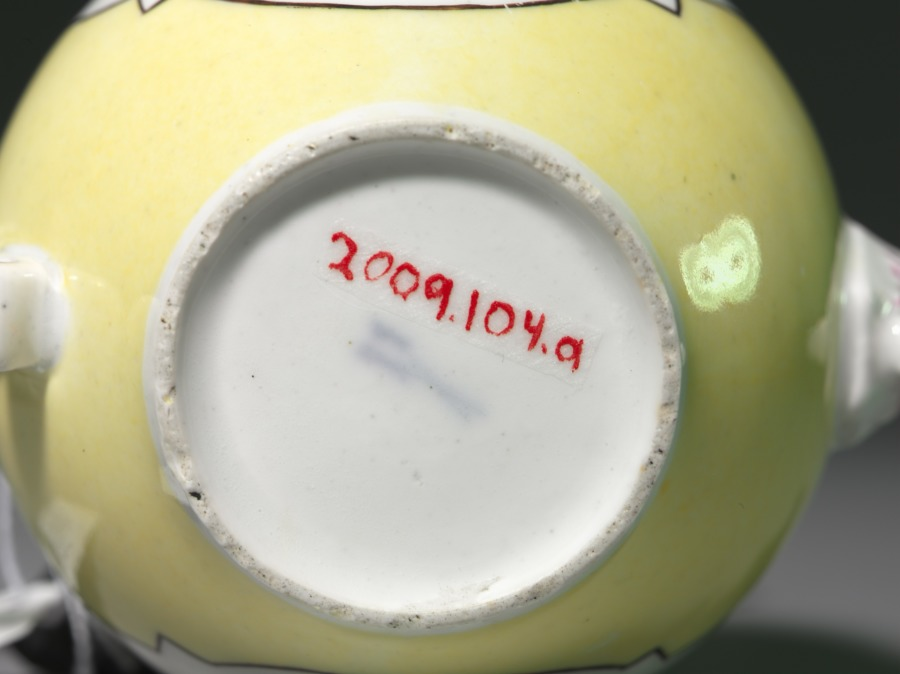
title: Teapot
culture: Germany, Meissen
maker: Meissen Porcelain Factory (German, est. c. 1710)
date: c. 1750–70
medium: porcelain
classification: Ceramic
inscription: Mark on the bottom that looks like two swords crossing, with a small V intersecting.